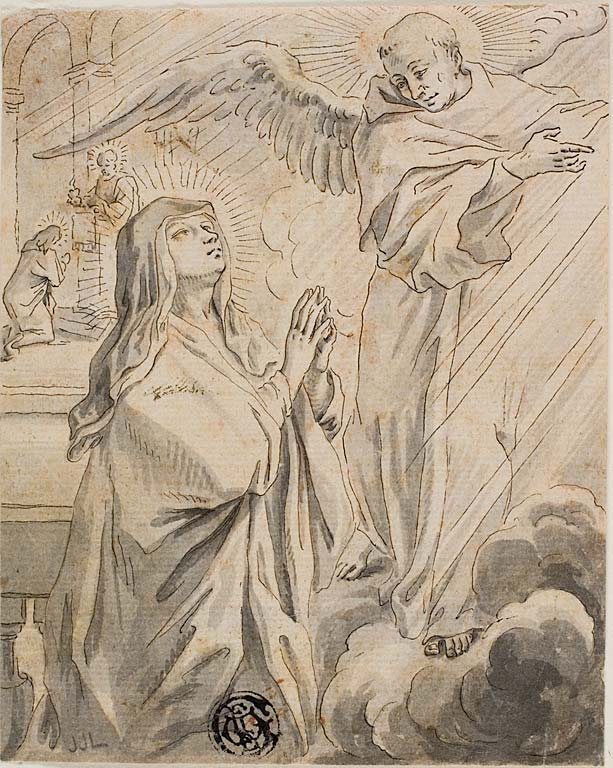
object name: Drawing and Watercolor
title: The Annunciation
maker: Gerard de Lairesse (Flemish, 1640-1711)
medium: Pen and black ink, with brush and gray wash, over traces of red chalk, on ivory laid paper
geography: Flanders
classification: pen and ink drawings; drawings (visual works); prints and drawing